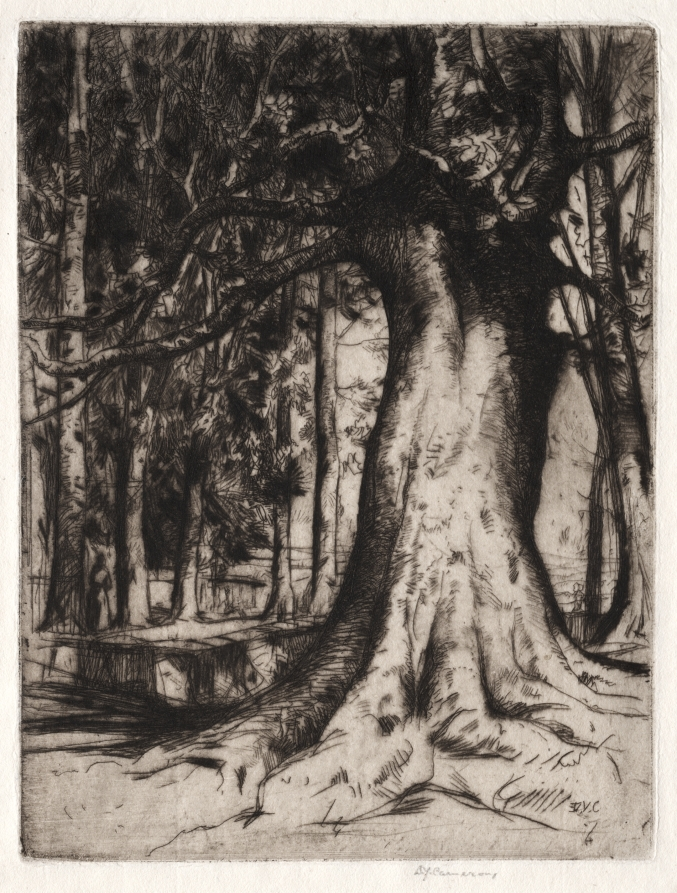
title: The Sycamore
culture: England, 20th century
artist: David Young Cameron (British, 1865–1945)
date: 1905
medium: etching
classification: Print